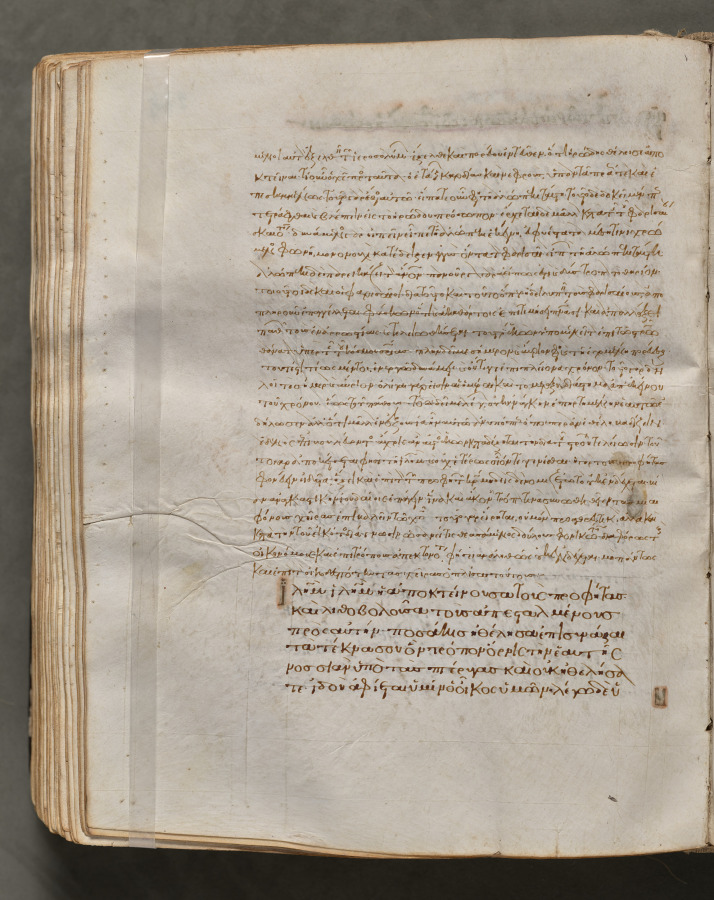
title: Text, folio 275 (verso), from a Gospel Book with Commentaries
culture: Byzantium, Constantinople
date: c. 1000–1100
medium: ink, tempera, and gold on vellum; leather binding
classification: Bound Volume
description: Each of the four gospels in this book opens on a page with brilliantly illuminated borders depicting the author of the text as well as birds—principally peacocks, symbols of the immortality of the soul—and fountains, representing the fountain of life and the salvation of the soul. This volume consists of 428 leaves with texts in Greek. Its level of sophistication suggests that it was probably written and decorated in a monastery in Constantinople.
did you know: Gospel books were carried in procession through Byzantine churches.